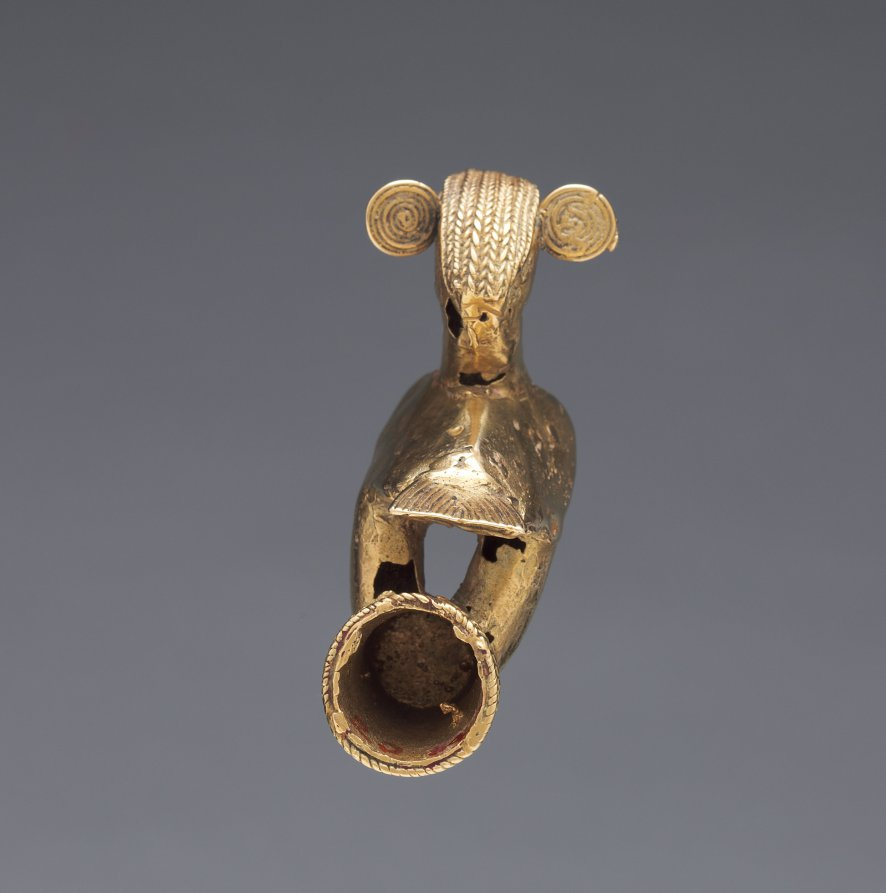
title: Staff Head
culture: Colombia, Sinú style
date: 400–1000 CE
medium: cast gold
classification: Metalwork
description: These finials probably fit over the ends of wooden staffs, emblems of rank. Unique to the Sinú area are finials with an image, often a bird, at a right angle to the base. This orientation suggests that the finials served as the finger grips of ceremonial spear throwers.